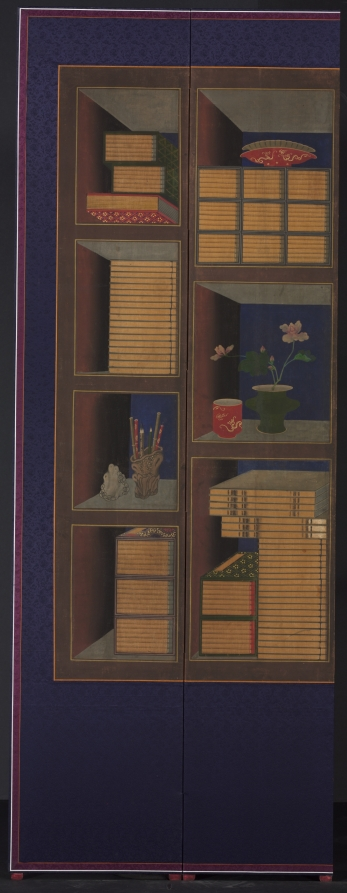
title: Books and Scholars’ Accoutrements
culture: Korea, Joseon dynasty (1392–1910)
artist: Yi Taek-gyun (Korean, 1808–after 1883)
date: late 1800s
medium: ten-panel folding screen; ink and color on silk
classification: Painting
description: First produced around the second half of the eighteenth century, chaekgado (literally, “pictures of bookshelves”) flourished throughout the 1800s as a royal emblem. And soon this pictorial genre became a popular furnishing item for aristocrats' elegant studies. The third panel from the right bears a hidden seal that reveals the artist: Yi Taek-gyun, a prominent court artist active in the late 1800s.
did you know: A convincing hypothesis that connects the Korean chaekgado tradition with the Renaissance tradition of illusionistic studiolo through the technique of trompe-l'œil and Chinese Qing period treasured cabinet paintings was first made in Park Shim-eun's thesis (2002).